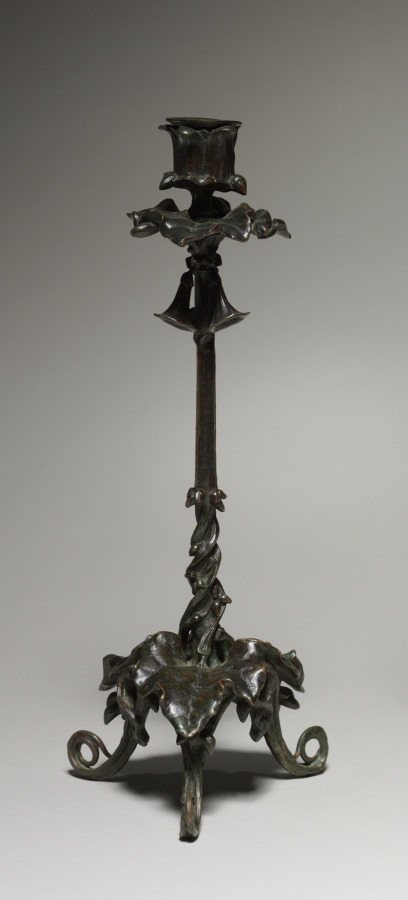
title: Candlestick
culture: France, 19th century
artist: Antoine-Louis Barye (French, 1796–1875)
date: 1800s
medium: bronze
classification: Furniture and woodwork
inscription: signed on underside of one of ivy leaves on base: "BARYE."